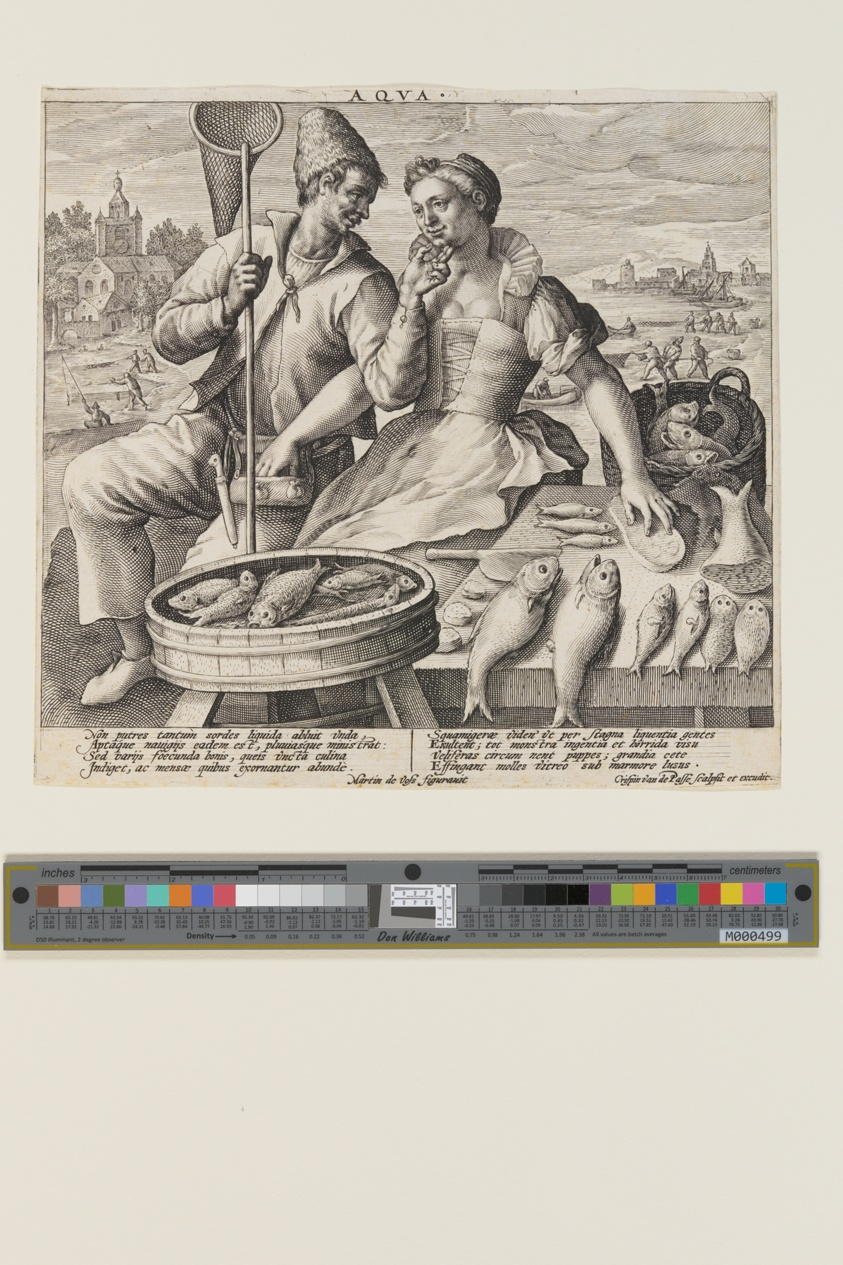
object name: Print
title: Aqua (Water), from The Elements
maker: Crispijn van de Passe I (Dutch, c. 1565–1637); after Maerten de Vos Maarten de Vos (Flemish, 1532–1603)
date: c. 1600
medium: Engraving on ivory laid paper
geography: Netherlands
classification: engraving; paper; print; prints and drawing